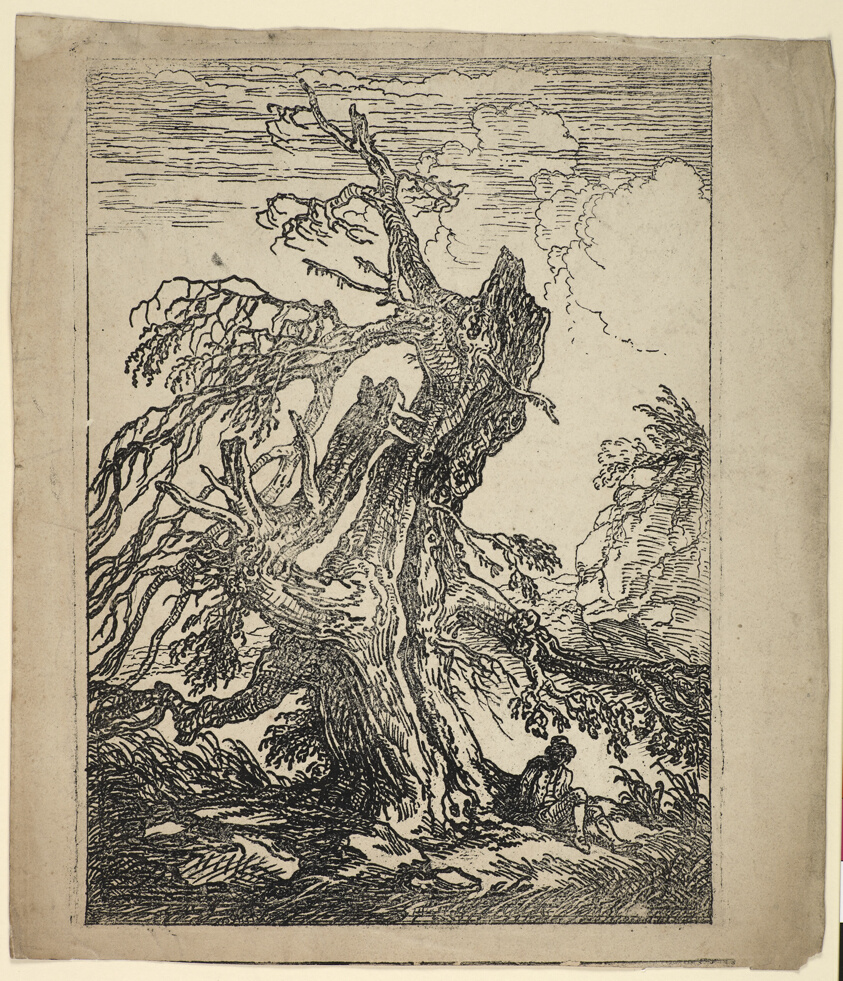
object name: Print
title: Study of a Tree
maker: Raphael Lamar West (American, active in London, 1769-1850)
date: 1802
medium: Lithograph in black on cream wove paper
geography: United States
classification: lithograph; print; prints and drawing